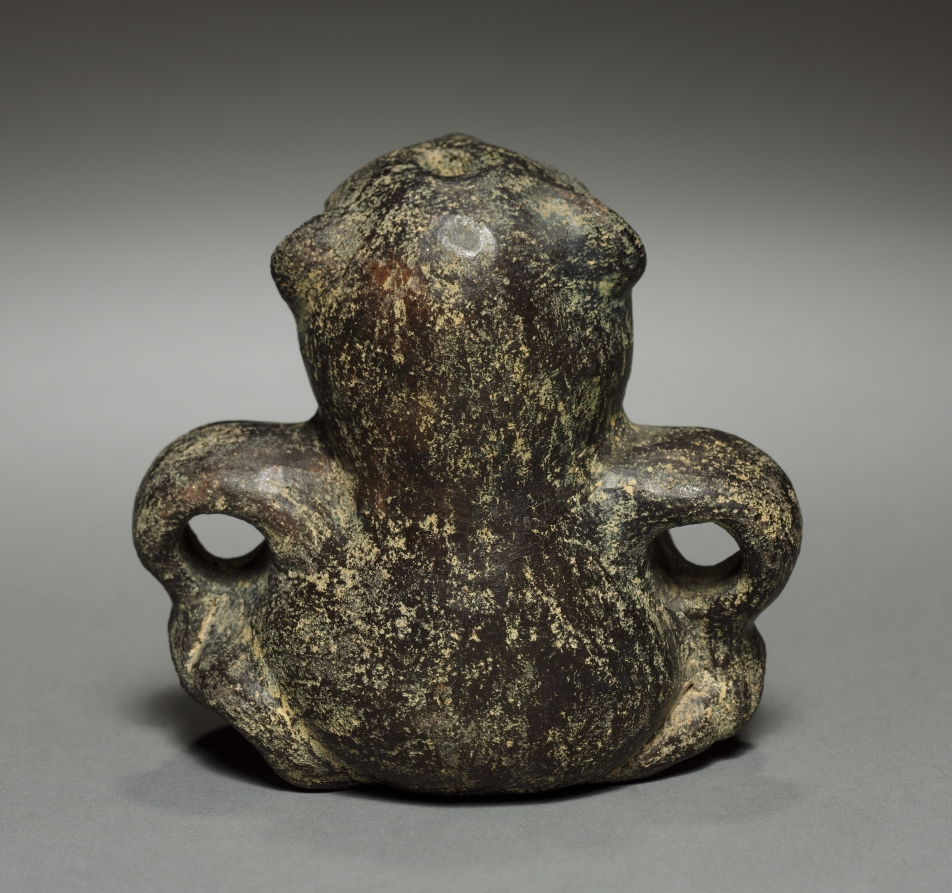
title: Seated Figure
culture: Colombia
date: before 1921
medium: pottery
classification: Ceramic